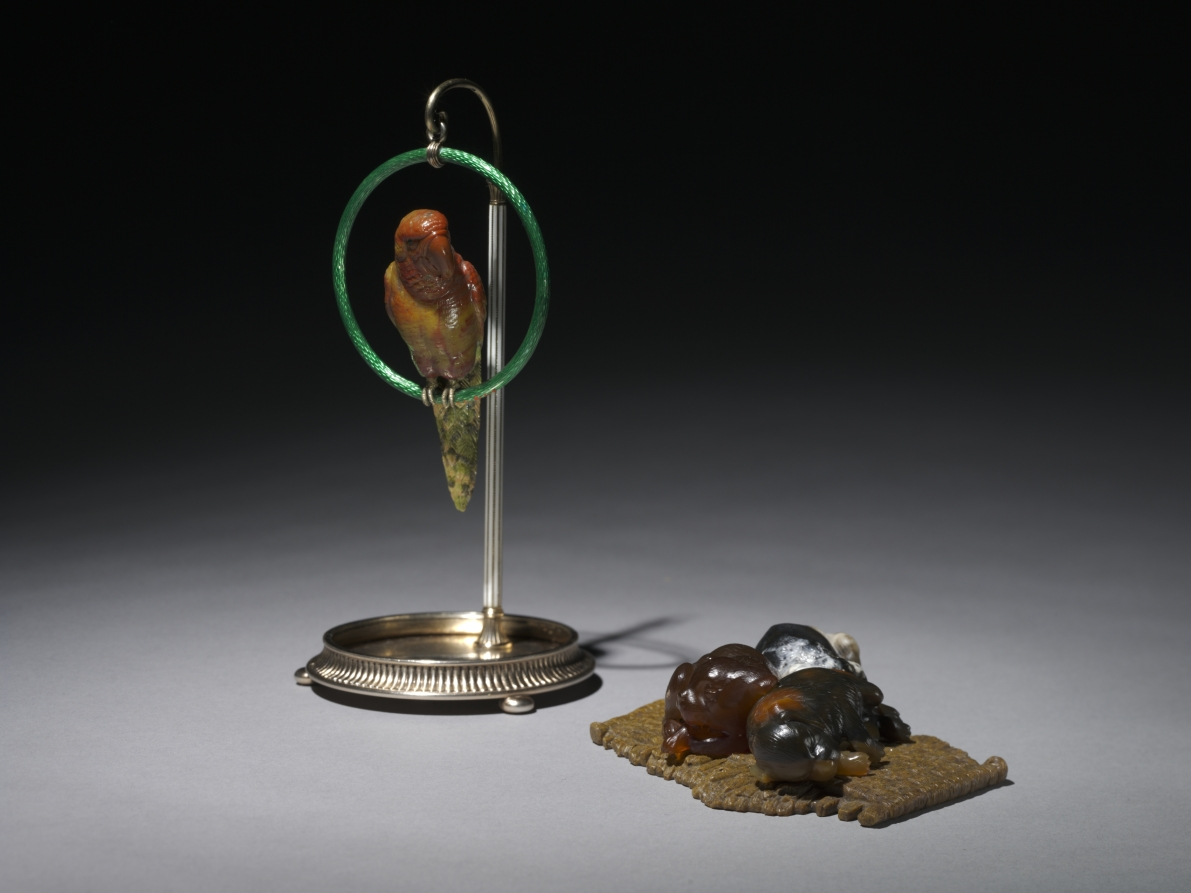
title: Sleeping Puppies on a Mat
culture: Russia, St. Petersburg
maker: House of Fabergé (Russian, 1842–1918)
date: c. 1895–1915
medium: agate, chalcedony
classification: Miscellaneous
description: In creating luxurious accessories for a desk or tabletop, Fabergé often used native hardstones such as multicolored agate and jasper, green nephrite, pink rhodonite, and rock crystal found in the Ural Mountains of western Russia. By paying careful attention to the unique colors and textures of the stones, Fabergé and his craftsmen brought them to life, turning milky agate into a begging poodle or brown and black jasper into these sleeping puppies. The use of native materials also promoted Russian nationalism, which appealed greatly to the tsar and his family.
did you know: Fabergé's artisans used multiple types of stone to make each puppy unique. Even the little rug they are sleeping on is made of stone.